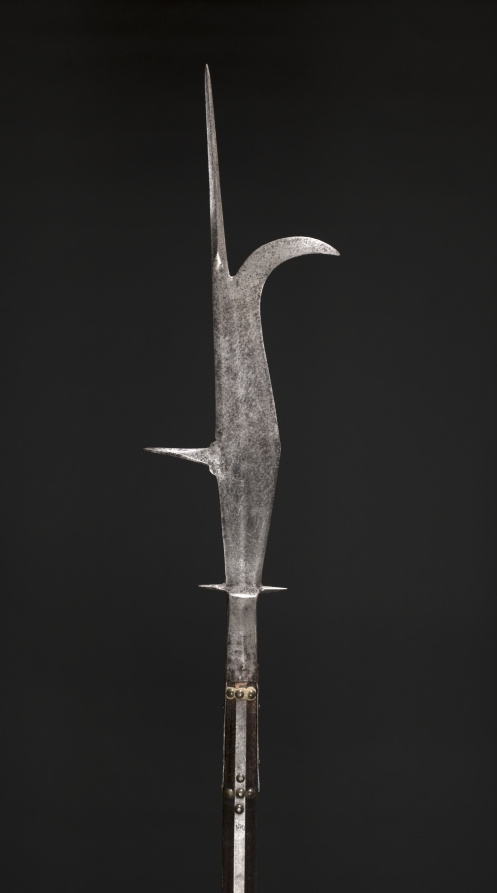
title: Bill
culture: Italy, 15th century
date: c. 1480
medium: steel, wood haft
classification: Arms and Armor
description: This weapon known as the "bill" was developed from an agricultural tool and was one of the first staff weapons to be used by medieval infantries. Used throughout Western Europe, it was particularly popular in Italy and England where it served as an equivalent to the Central European halberd. Fitted with a pronounced hook whose inside and outside curves were cutting edges, it was topped by a long spike.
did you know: With its long shaft, the bill was useful for reaching mounted men, and a military version soon emerged.